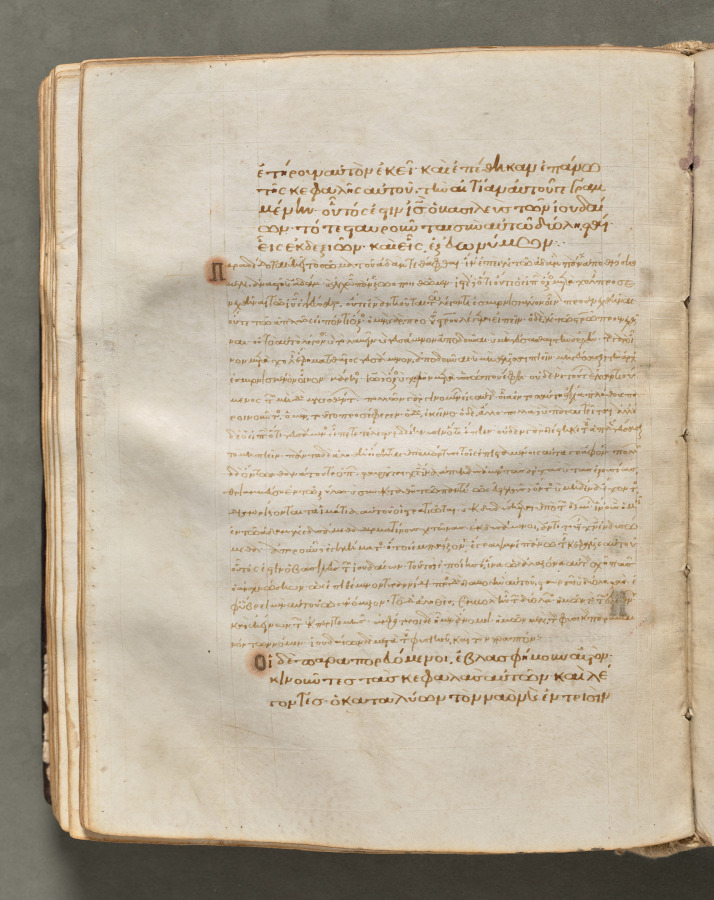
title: Text, folio 125 (verso), from a Gospel Book with Commentaries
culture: Byzantium, Constantinople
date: c. 1000–1100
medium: ink, tempera, and gold on vellum; leather binding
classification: Bound Volume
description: Each of the four gospels in this book opens on a page with brilliantly illuminated borders depicting the author of the text as well as birds-principally peacocks, symbols of the immortality of the soul-and fountains, representing the fountain of life and the salvation of the soul. This volume consists of 428 leaves with texts in Greek. Its level of sophistication suggests that it was probably written and decorated in a monastery in Constantinople.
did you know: Gospel Books were carried in procession through Byzantine churches.